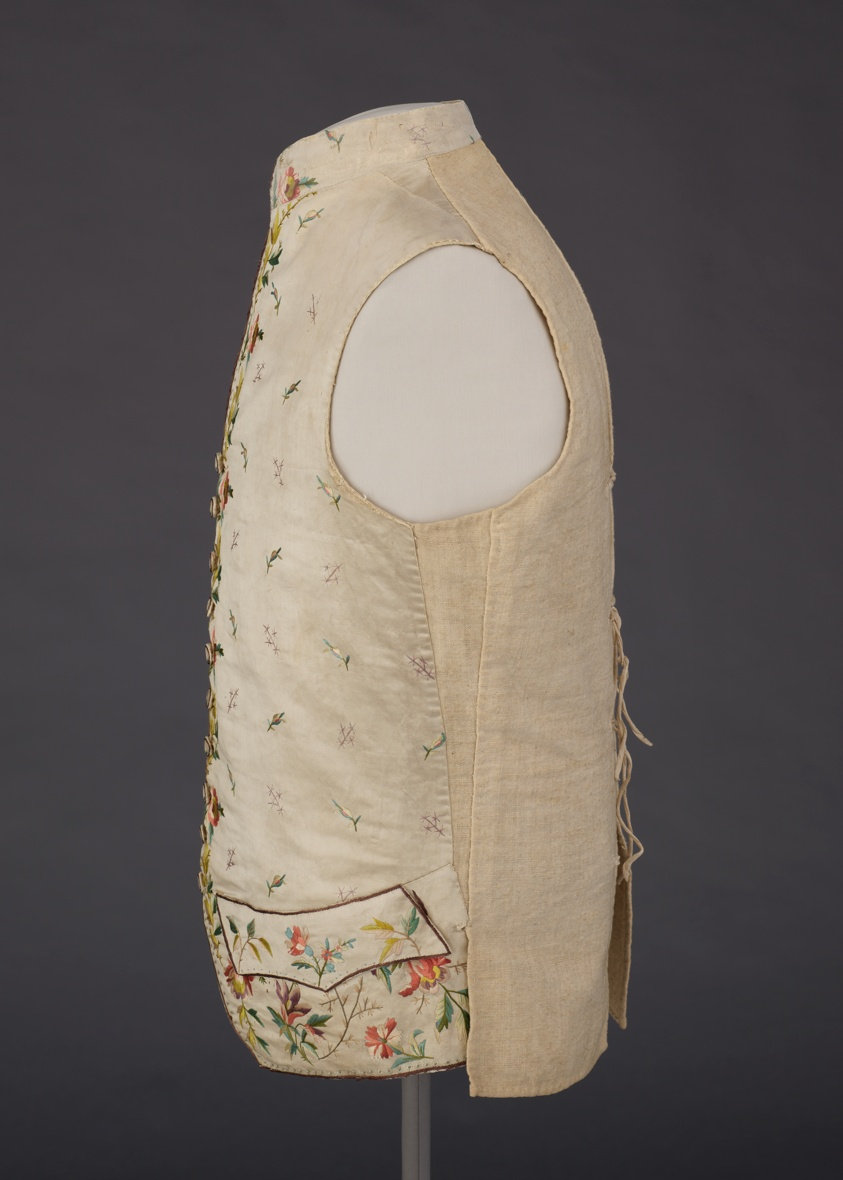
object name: Costume and Accessories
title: Man's Waistcoat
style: 18th Century, Rococo, Neoclassicism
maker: Possibly Lyon, France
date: Embroidered 1780s; altered 1795–1805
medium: Front: Silk, satin-weave foundation, embroidered with silk thread in satin, steam and buttonhole stitches and French knots; embroidered fabric covered buttons; silk, twill weave lining; back: linen, plain weave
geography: France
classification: waistcoat (garment); costume; needlework (visual works); dress (garment); clothing; textile; costume - embroidery; garment; costume - needlework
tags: flowers, roses, fashion, floral, floral motifs